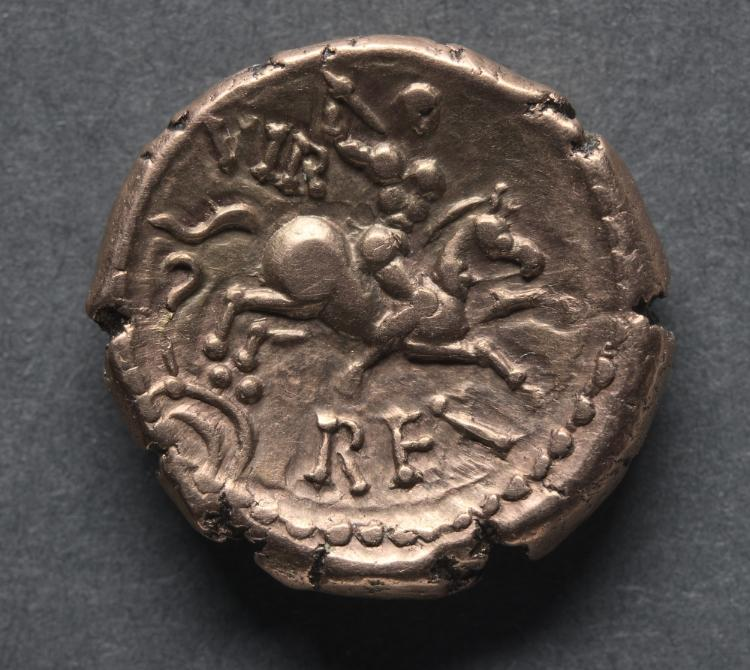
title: Verica Stater: Sunken Tablet (obverse)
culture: England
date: c. 10–40 CE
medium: gold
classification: Coins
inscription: "COM F"